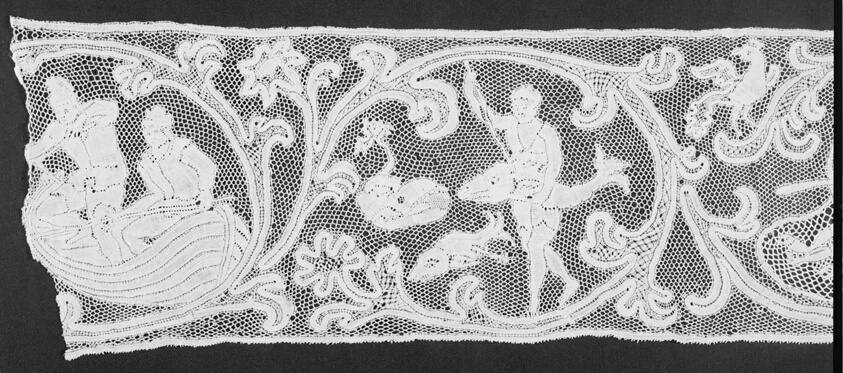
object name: Textile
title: Border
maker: Italy, probably Milan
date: 1701/50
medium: Linen, bobbin part lace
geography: Italy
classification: textile; lace - bobbin; lace